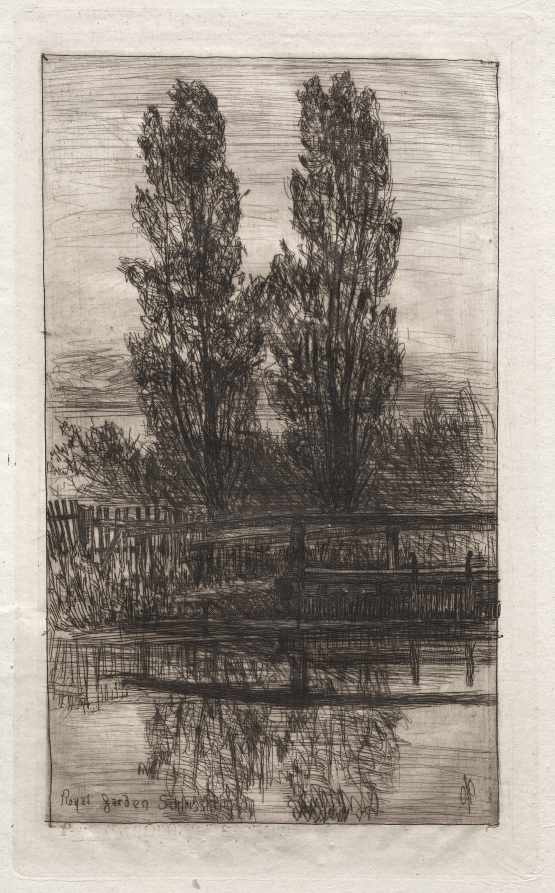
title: Poplars, Royal Garden, Schleissheim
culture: America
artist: Otto H. Bacher (American, 1856–1909)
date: 1879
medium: etching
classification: Print